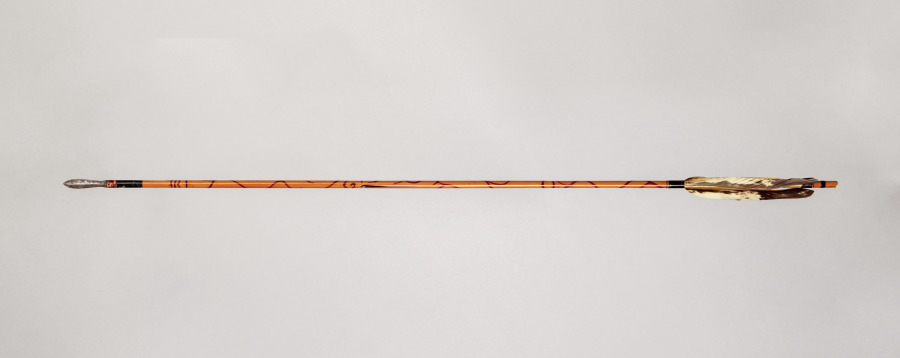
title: Arrow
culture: Japan, Edo period (1615–1868) to Meiji period (1868–1912)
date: 1800s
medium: bamboo shaft tipped with metal point and heeled with feathers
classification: Arms and Armor